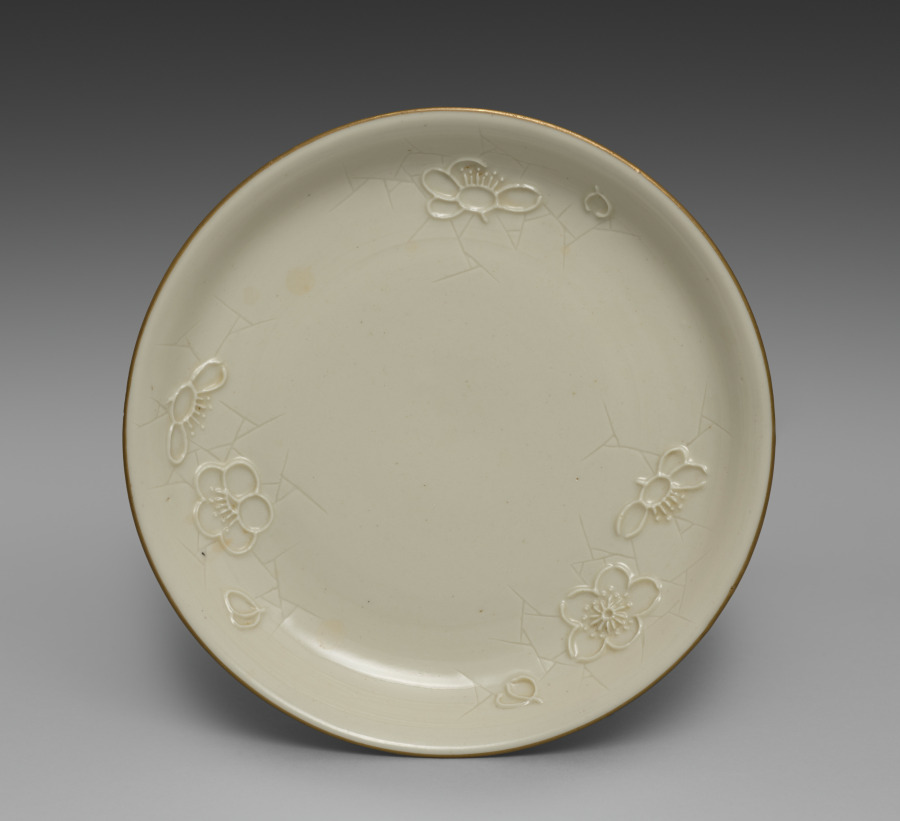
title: Medium-sized Dish from Dining Set with Plum Blossoms and Cracked-Ice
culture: Japan, Meiji period (1868–1912)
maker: Seifū Yohei II (Japanese, 1844–1878)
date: c. 1875–78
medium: Porcelain with molded designs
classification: Ceramic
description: Each item in this set has a delicate low-relief design of flowering plum branches over scattered, intersecting lines meant to resemble the cracked-ice surface of a frozen body of water and is signed on the base in gold pigment. While Yohei II produced many fine works in underglaze blue, like those produced by Kiyomizu Shichibei, he also made works in quite different styles later in his career, from the early 1870 s. In 1873, he was appointed purveyor to the Industrial Center of Kyoto Prefecture, a designation associated with Kyoto’s efforts to reach an international market through the port of Kobe; and from 1875 until his death, he was involved in national-level projects to present Japanese ceramics across the world. It was during this period that Yohei III was apprenticed to Yohei II, and it has been suggested that this set may in fact be an early example of Yohei III’s work, which he signed with his teacher’s name. Decorated with flowers resembling Japanese textile motifs, the set calls to mind the design of Yohei II’s pair of vases with plum blossoms in the Victoria and Albert Museum. Here, the elaborate trees created for a formal public exhibition setting have been translated into the approachable blossoms of the genteel domestic environment. While the designs are consistent across the pieces, each raised flower petal and pistil and each incised line in the ice was done by hand, so the cups, bowls, and dishes are similar yet unique. The bottoms of two boxes once identified the set’s owner, but the information has been deliberately obscured with black ink. However, inscriptions still visible appear to indicate two occasions, once at the end of July 1886 , and once again in June 1916 , when parts of the set were requested from Hokura in Niigata Prefecture. The location corresponds to a neighborhood in the present-day city of Jōetsu. The surname Tsuji 辻 also appears on a paper tag affixed to one of the box cloths. Future research may possibly reveal more about their provenance. A vase by Yohei III in a private collection combines the formal grandeur of the Yohei II vases in the Victoria and Albert Museum with the gentler design of this dining set, placing flowering plum trees against soft, scalloped-edge clouds resembling those in golden screens.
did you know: The dining wares have a creamy white coloration that the four boxes containing them identify as Korean in style.